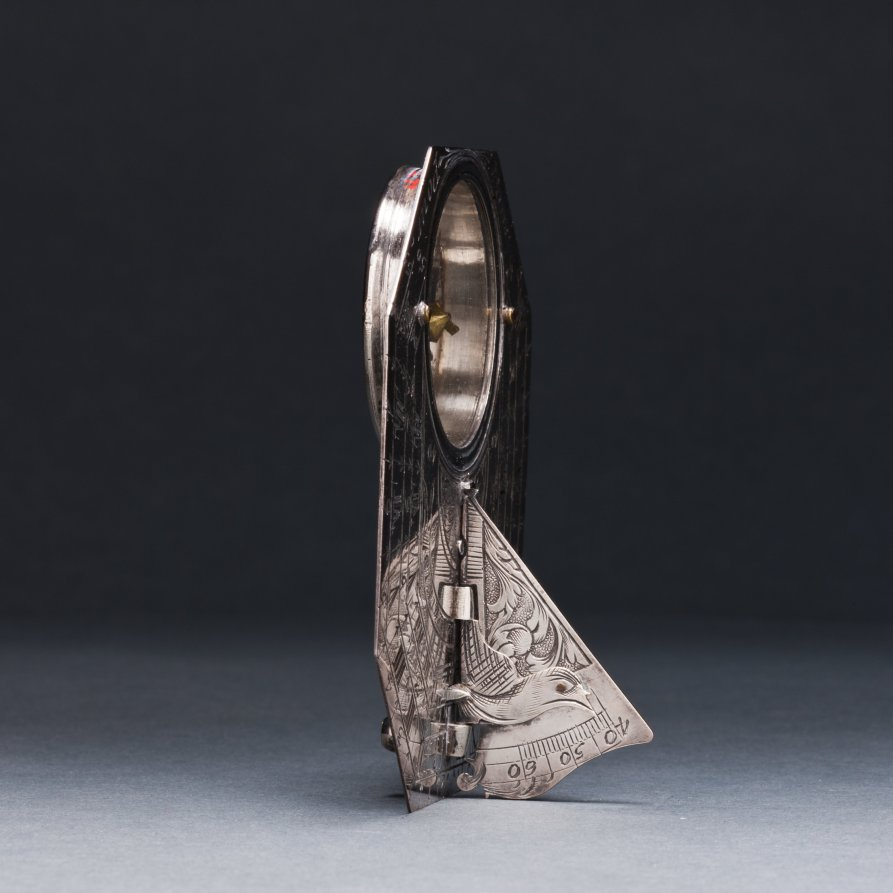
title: Butterfield Sundial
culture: France, 18th century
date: 1700s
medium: silver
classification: Silver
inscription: [Engraved signature above the compass in ribbon band]: "N. BION A Paris"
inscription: [Engraved on the face of the sundial]: “Pour 55° 4-5-6-7-8-9-10-11 50° IIII-V-VI-VII-VIII-IX-X-XI 45° 5-6-7-8-9-10-11 40° -VI-VII-VIII-IX-X-XI'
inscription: [Engraved on the other side]: "Pour 55° -8-7-6-5-4-3-2-1-0 50°-VIII-VII-VI-V-IIII-III-II-I 45°-8-7-6-5-4-3-2-1 40°-VII-VI-V-IIII-III-II-I"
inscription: [Engraved around the compass]: “NORD-OUEST-SUD-EST”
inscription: [Engraved on the back of the sundial]: “Turin 44 Milan 46 Paris 49 Lion 46 Metz 49 Rome 42 Liege 51 Naples 44 Namur 50 Gennes 44 Marseille 43 Grenoble 45 Bayonne 43 Bruxelle 51 Londres 52 Nantes 47 Vienne 48 Toulon 43 Tours 47 Lille 51”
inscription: [Engraved around the back of the compass]: “Venise 45 Strasbourg 49 Amsterdam 52 Hambourg 54 Varsovie 52 La Rochelle 46”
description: Butterfield-type sundials are characterized by their adjustable gnomons, metal flaps that cast a shadow on the dial’s face to indicate the hour, and geographical indices. This sundial has a scale adjustable between latitudes of 40° to 60° north. The latitudes of 26 European towns are engraved on its back for quick reference. With an intricately engraved silver face, it would have functioned as a fashionable traveler’s accessory.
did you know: Butterfield-style sundials were named after Micheal Butterfield, an English scientific and mathematical instrument maker who worked in Paris between 1674 and 1724.